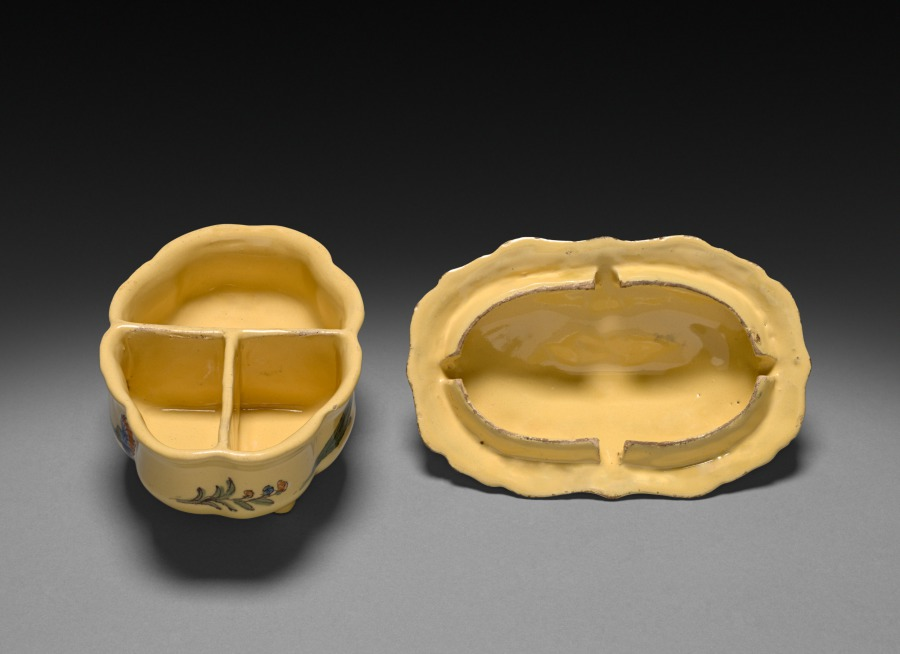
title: Covered Spice Bowl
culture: France, Montpellier, 18th century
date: c. 1775–80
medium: faience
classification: Ceramic